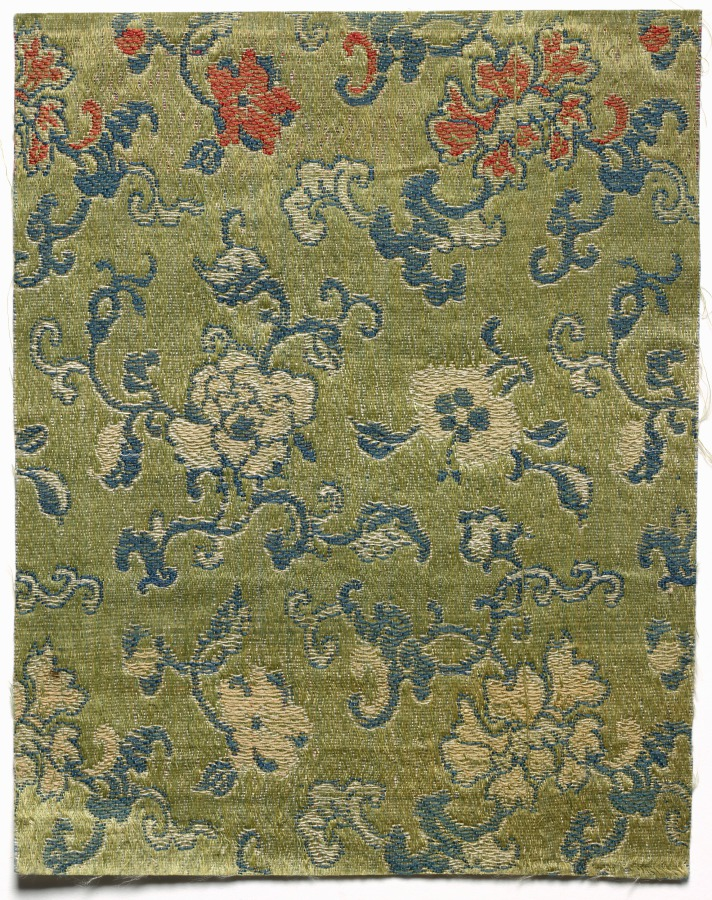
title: Fragment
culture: China, 19th century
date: 1800s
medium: satin ground; silk diasper weave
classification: Textile